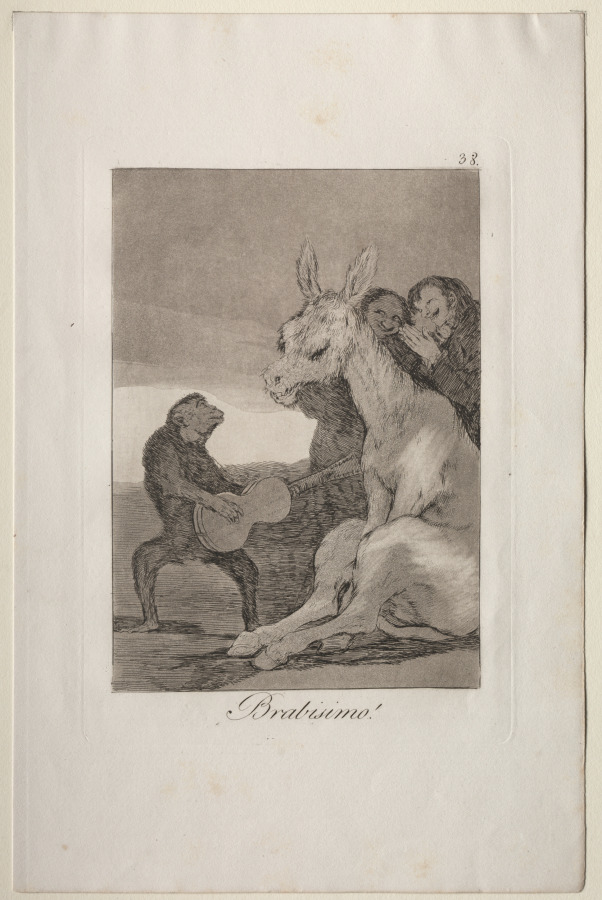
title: Bravo!, Plate 38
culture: Spain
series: Los Caprichos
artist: Francisco de Goya (Spanish, 1746–1828)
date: 1799 (printed c. 1855)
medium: etching and aquatint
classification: Print